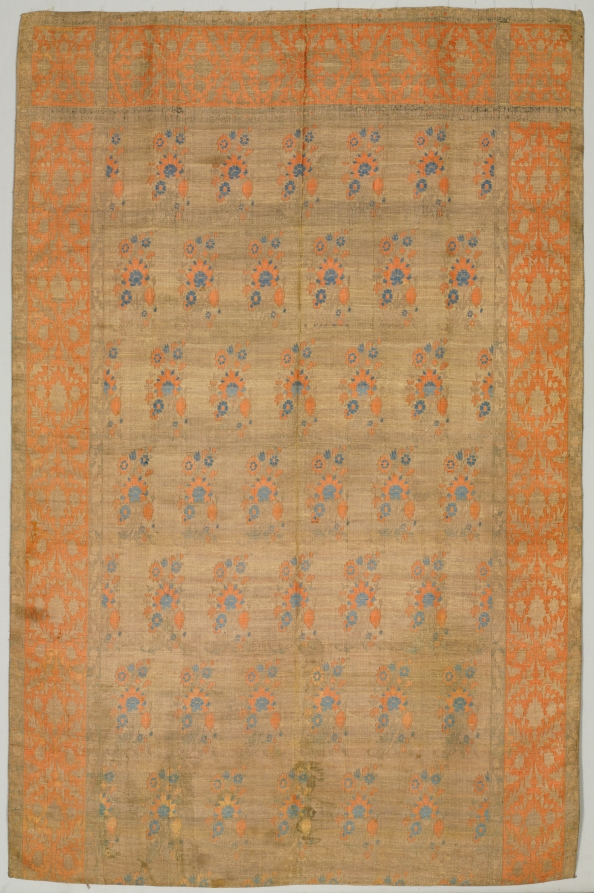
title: Velvet fragment from a palace curtain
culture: Iran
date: 1700s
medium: taquete silk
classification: Textile